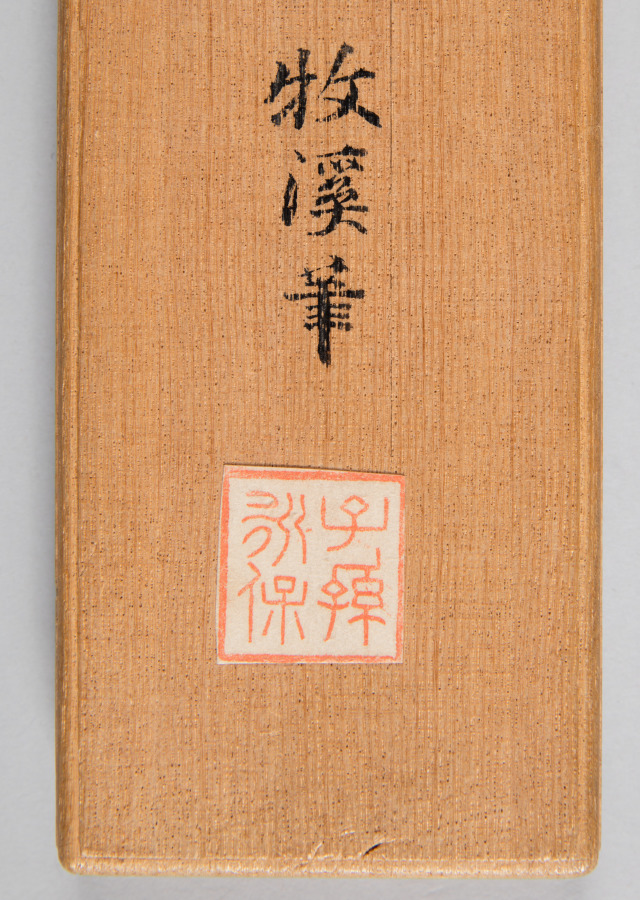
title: Reeds and Geese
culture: Japan, Kamakura period (1185–1333)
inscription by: Yishan Yining [Issan Ichinei] (Chinese, 1247–1317)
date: 1314–17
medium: hanging scroll; ink on paper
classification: Painting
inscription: signed: Issan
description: Reeds and geese has been a common pairing in Chinese literary and visual culture for many centuries. This painting presents the contribution of a Japanese amateur painter, almost certainly a Zen Buddhist monk, to Japan’s fledgling efforts to add the theme to its own cultural vocabulary in the early 1300s. As was customary at the time in Japan, the painter did not sign or seal his work; the inscription, a poem added to the painting by the eminent émigré monk Yishan Yining, along with his signature and seal, was of far greater cultural value. Today, the modestly sized painting has tremendous significance as one of the earliest surviving examples of Japanese ink paintings with reeds and geese.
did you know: Tokyo National Museum owns a copy of this painting made by Kano Gyokusen (1796–1864) when he was 14 years old.